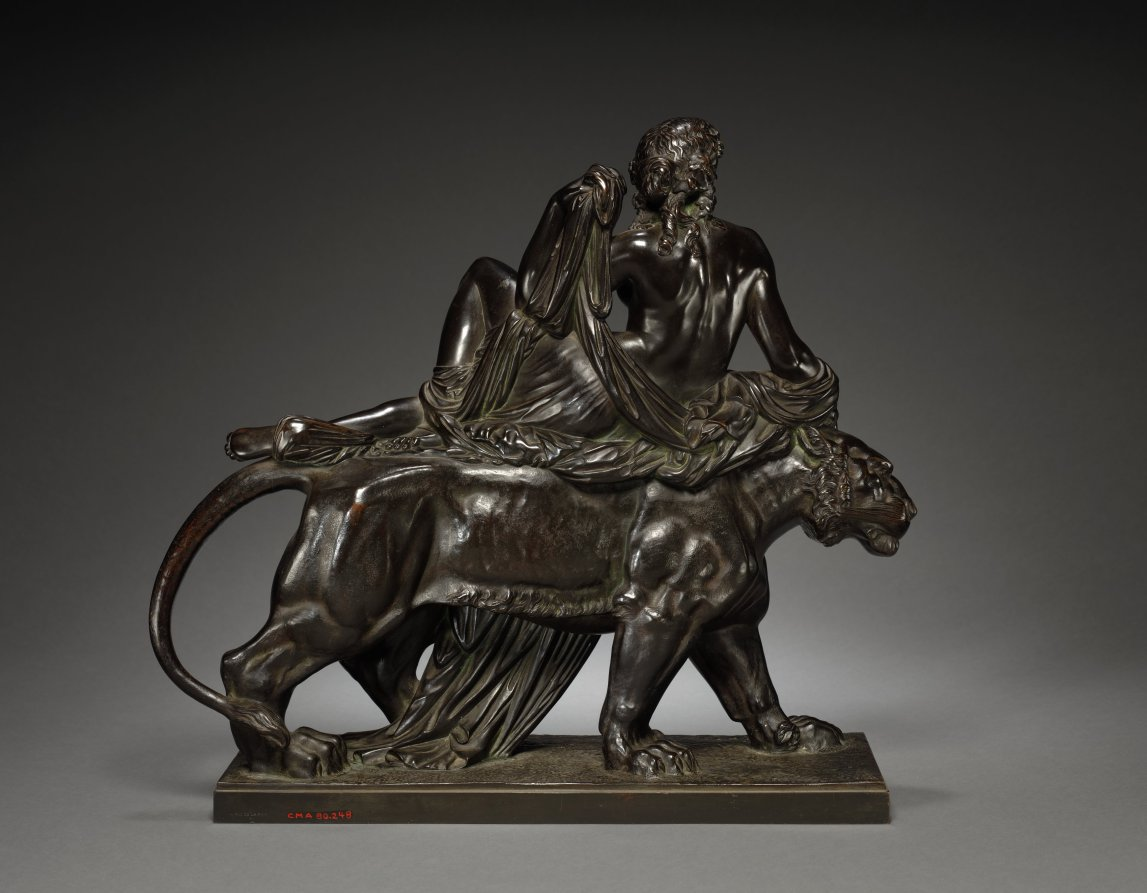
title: Ariadne on a Panther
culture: France, 19th century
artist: Jean-Baptiste Clésinger (French, 1814–1883)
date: 1873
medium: bronze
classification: Sculpture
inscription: signed on side of base: "J. CLESINGER"; inscribed around edge of stamp: "BRONZE ARTISTIQUE/DE PARIS"; on cut of neck of woman, "CAYUZ"; on edge of base: "1 Rue de la PAIX."